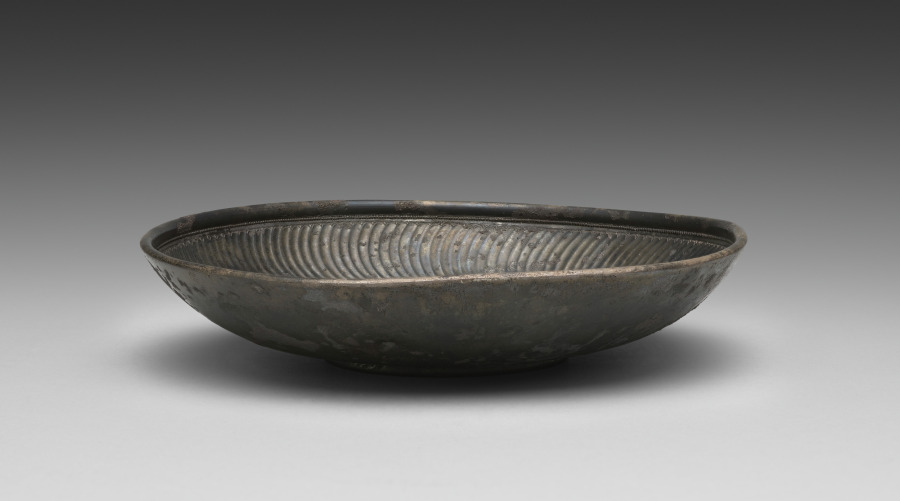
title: Bowl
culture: Roman, Imperial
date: c. 100–300 CE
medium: silver: cast and carved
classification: Metalwork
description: This large cast silver bowl features wavy fluting (sometimes called strigilation) across much of the interior, terminating in a sort of scalloped edge and finely beaded border beneath the rim. Within the central medallion are a miniature oblong shell-like object and the punched inscription VERISS (perhaps a name), both slightly off-center. The combination of wavy fluting, scalloped edges, and a shell-like object may allude to the sea, or to the liquid contents this bowl may once have contained.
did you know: This solid silver bowl weighs nearly one kilogram, more than two pounds.